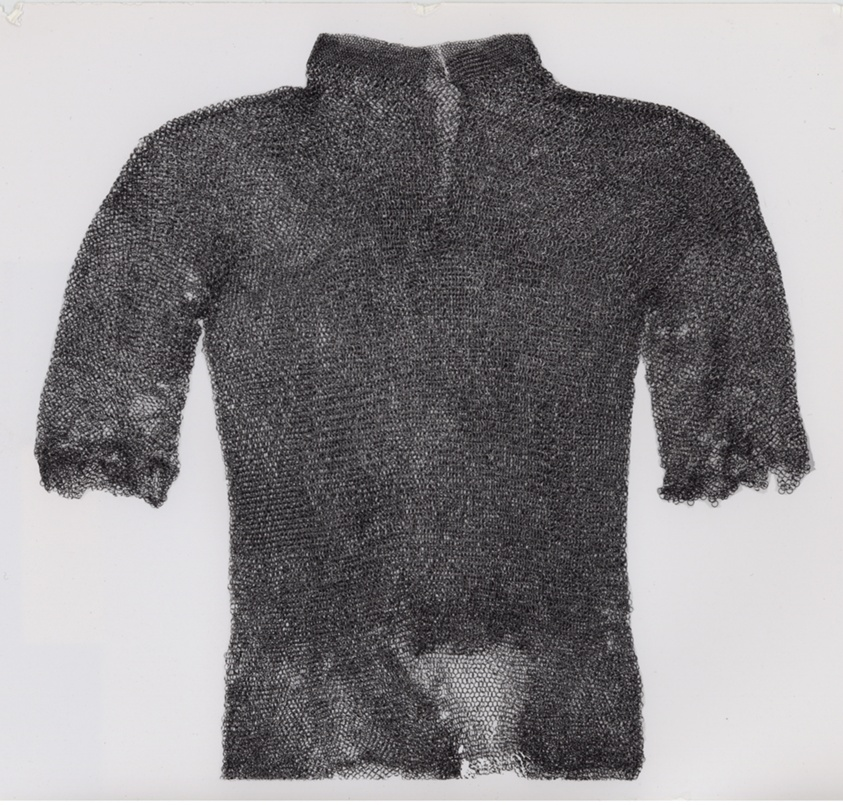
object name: Armor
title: Mail Shirt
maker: European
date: first half of 16th century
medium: Steel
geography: Europe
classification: suit-element; armor; arms and armor